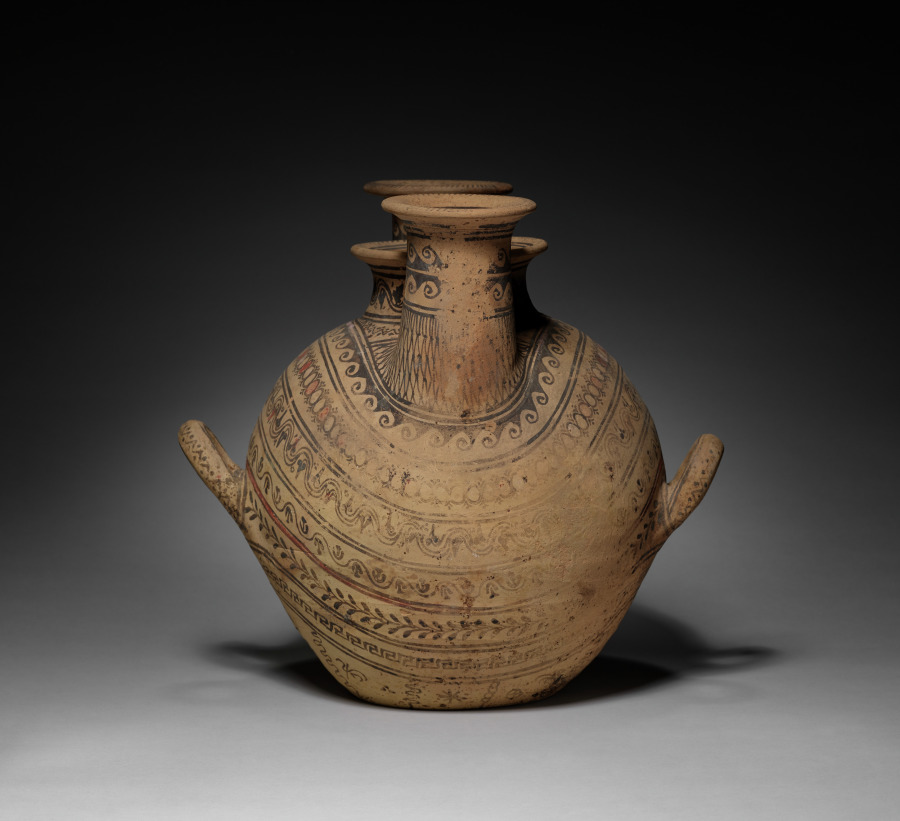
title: Two-Spouted Strainer Askos (Flask)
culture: South Italian, Daunian or Canosan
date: 300–200 BCE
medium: ceramic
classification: Ceramic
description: Although now referred to by the Greek term askos, because of its resemblance to the animal skins used to hold wine in ancient Greece, this ceramic shape developed in the South Italian region of Daunia (north of Apulia, on the Adriatic coast). This example is unusual for its three openings—one covered by a lid, the others spouted with built-in strainers. Its profusely painted decoration, mostly geometric and vegetal patterns applied in black with added red and white, is arranged in bands that follow the contours of the vessel.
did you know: Each spout has a built-in strainer—one near the top, the other near the bottom.